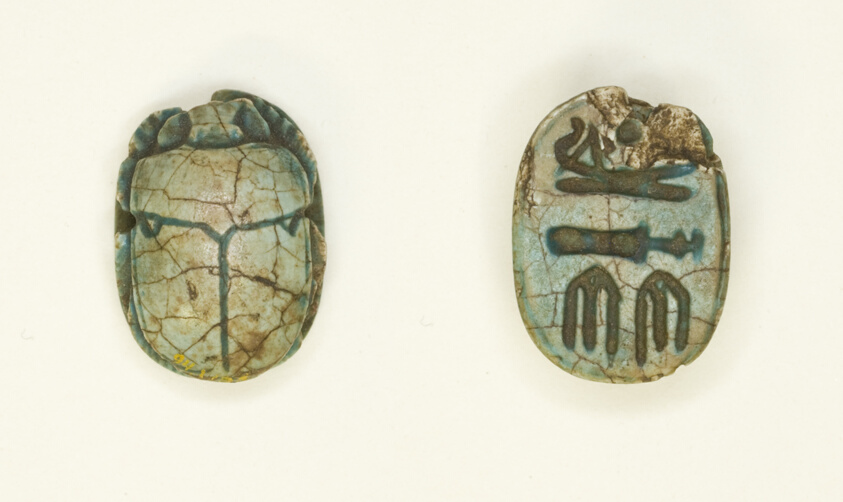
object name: Costume and Accessories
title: Scarab: Wish Formula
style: third intermediate period, ancient, egyptian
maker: Egyptian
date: Third Intermediate Period, Dynasties 21-25 (about 1069-664 BCE)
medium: Glazed steatite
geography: Egypt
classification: scarab; ancient art; costume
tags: Hieroglyphs, boats, gods (deities), insects, sun, suns